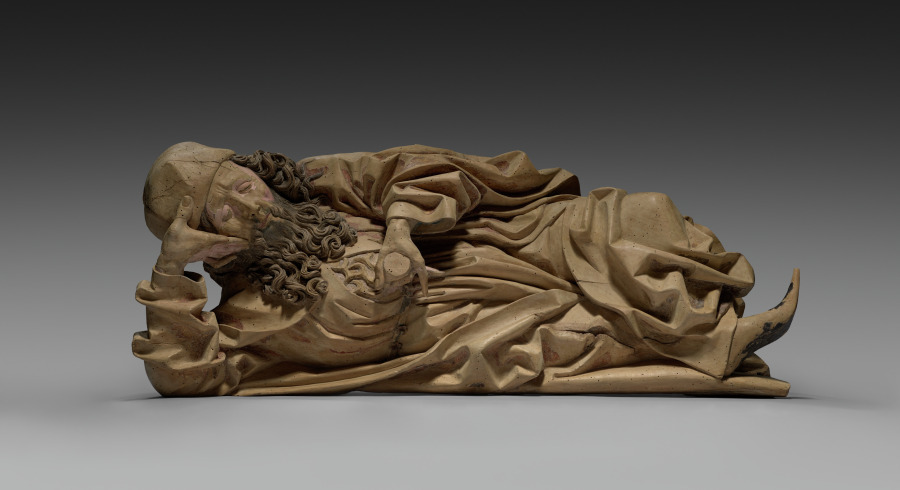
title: Jesse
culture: Germany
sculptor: Veit Stoss (German, c. 1445–1533)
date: c. 1500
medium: Limewood, polychromed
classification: Sculpture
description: The figure shows the sleeping Jesse, the father of David from the Old Testament. As the ancestor of the family tree of Christ, he was depicted in the Middle Ages sleeping as the starting point of the tree, on whose branches the ancestors of Christ are depicted. Mary with the Christ child is always shown at the top. The figure comes from a wooden altarpiece from an unknown church, possibly in Nuremberg, which is now lost. Veit Stoss is one of the most prominent German sculptors around 1500 who was mainly active in Nuremberg (Bavaria, Germany) and Krakow (Poland), also as a painter and engraver.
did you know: The family tree of Christ starts from Jesse, the father of David in the Old Testament.